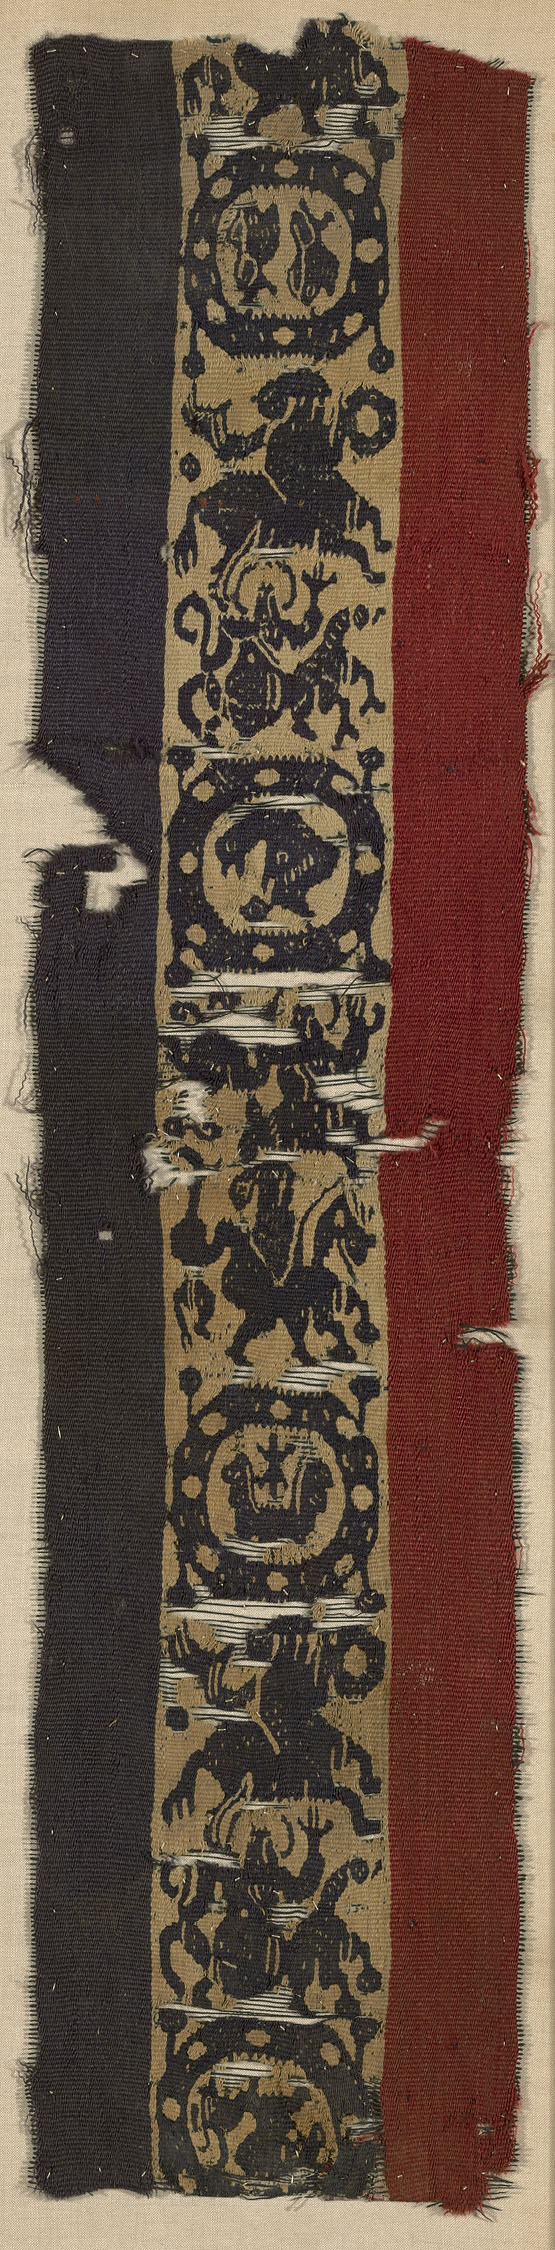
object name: Textile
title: Fragment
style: roman period (egyptian)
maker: Egypt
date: Roman period (30 B.C.– 641 A.D.)/Arab period (641–969), 6th/7th century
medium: Linen and wool, tapestry weave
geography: Egypt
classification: textile; weaving